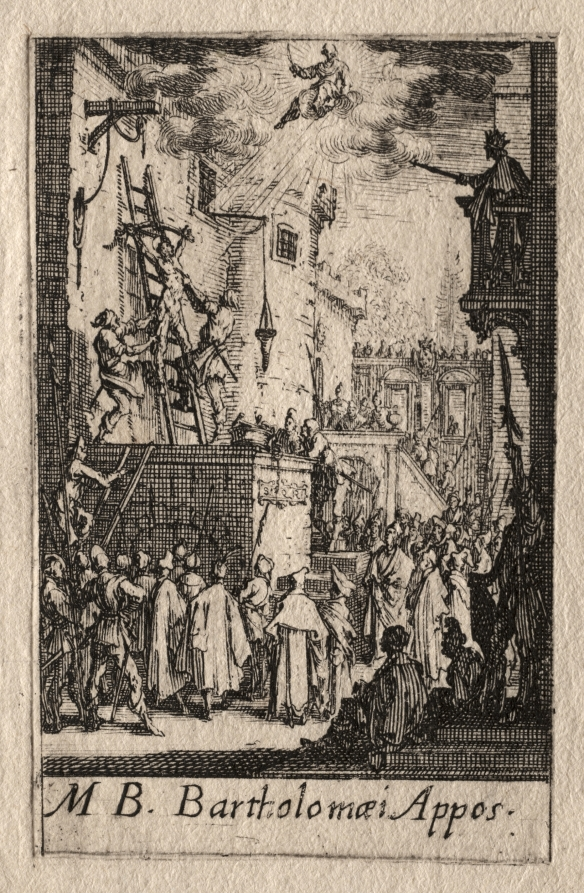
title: The Martyrdom of the Apostles: St. Bartholomew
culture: France, 17th century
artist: Jacques Callot (French, 1592–1635)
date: ca. 1632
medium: etching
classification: Print